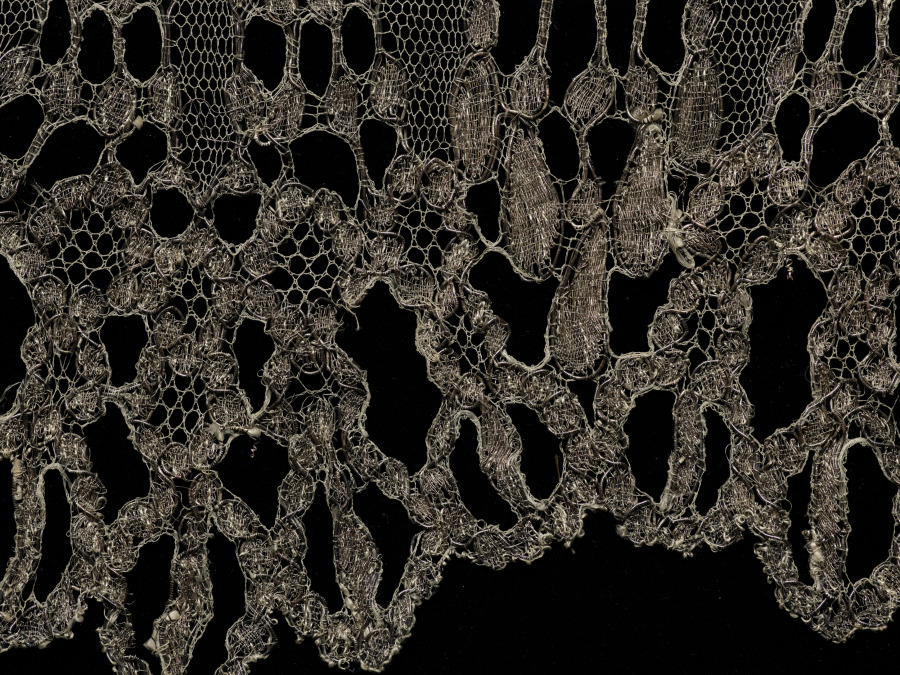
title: Lace Edging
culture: Spain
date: 1800s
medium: Silk and metallic thread: bobbin lace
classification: Lace